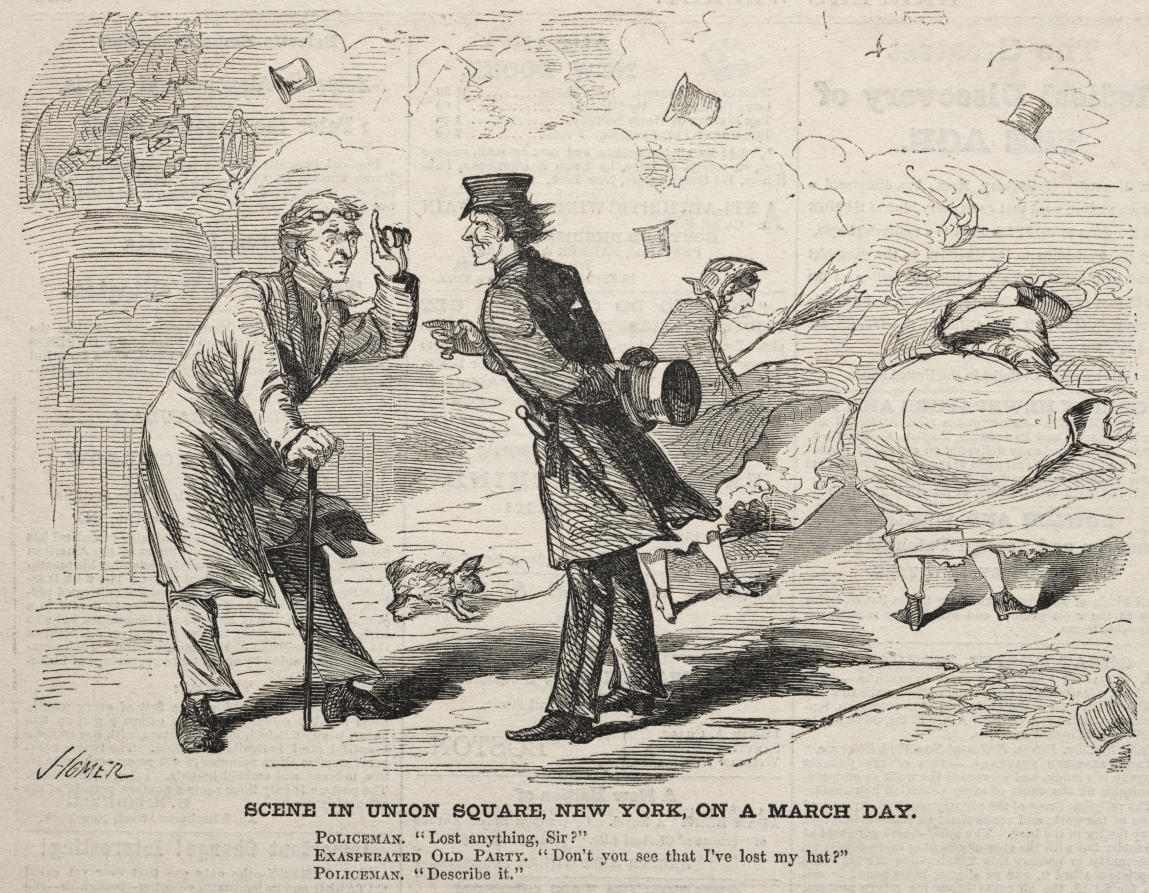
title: Scene in Union Square, New York, on a March Day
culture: America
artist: Winslow Homer (American, 1836–1910)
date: 1860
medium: wood engraving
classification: Print